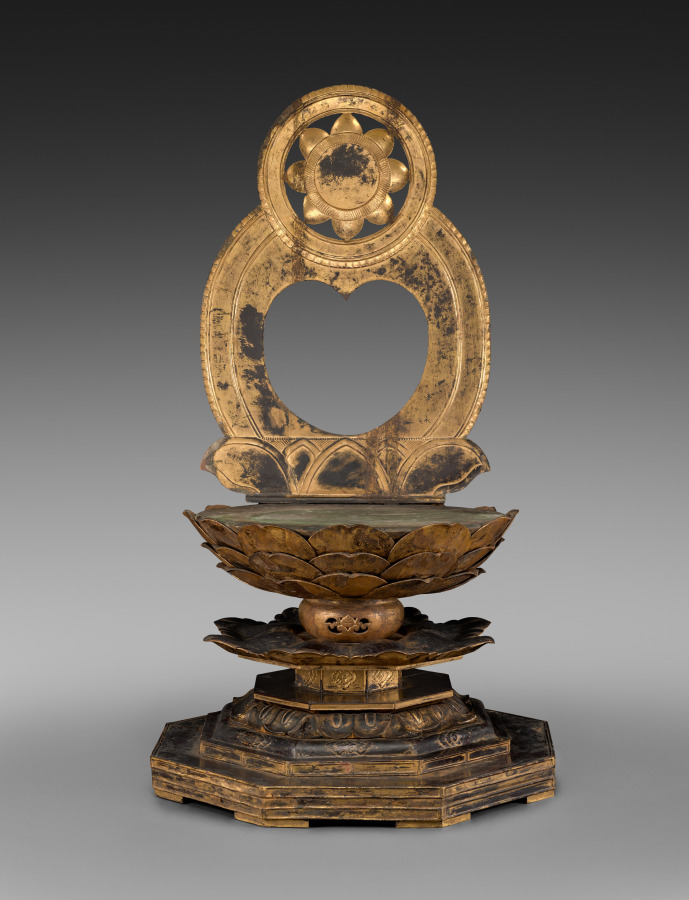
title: Seated Buddha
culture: Japan, Heian period (794–1185)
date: 1100s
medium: gilded wood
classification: Sculpture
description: Composed of a number of hollowed-out pieces of wood that were then covered with lacquer and gilding, this sculpture served as an image of worship in one of the small temples surrounding Kōfukuji, a major Buddhist temple in Nara, Japan. Like many Buddhas, this figure has its right hand positioned in a gesture meaning "fear not." The left hand is a replacement, so its original gesture, a clue to this Buddha's identity, is unknown. However, as the left foot is exposed over the garment, in lotus position, it may have been created as a Medicine Master Buddha, Yakushi Nyorai in Japanese, or the Buddha of our era, Shakyamuni.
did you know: A 1906 photo taken at Kōfukuji shows this sculpture without a halo or left hand.